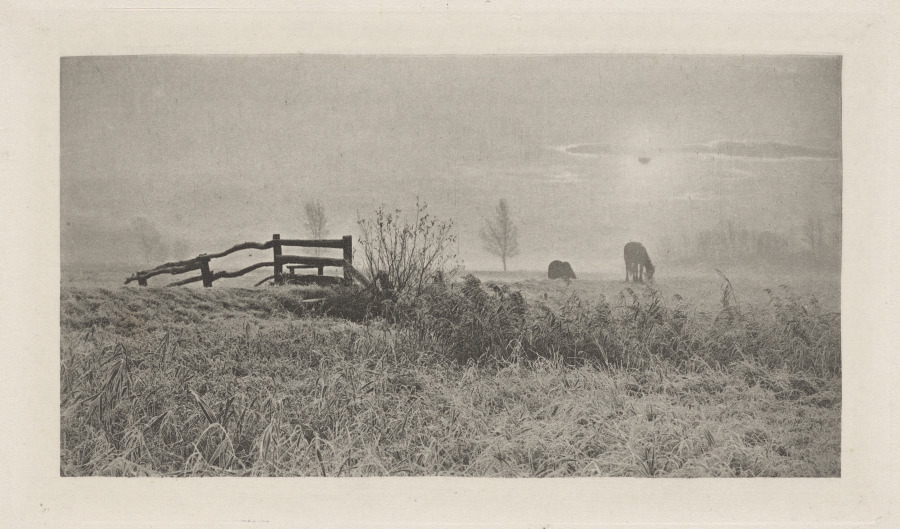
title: A Winter's Sunrise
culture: England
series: Marsh Leaves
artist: Peter Henry Emerson (British, 1856–1936)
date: before 1891, published 1895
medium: photogravure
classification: Photograph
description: Marsh Leaves, in which this image appears, was Emerson’s last book of photographs. Published in 1895, it is generally considered his best and most influential body of work. He had moved from naturalism to a graphic style so radical that it sometimes verged on abstraction. This looser, more expressionistic, and emotional late style helped lay the groundwork for Pictorialist photography, which dominated fine art photography in the early 20th century.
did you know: In 1886, the year after completing medical school, Peter Henry Emerson became a full-time photographer and published his first book of photographs.